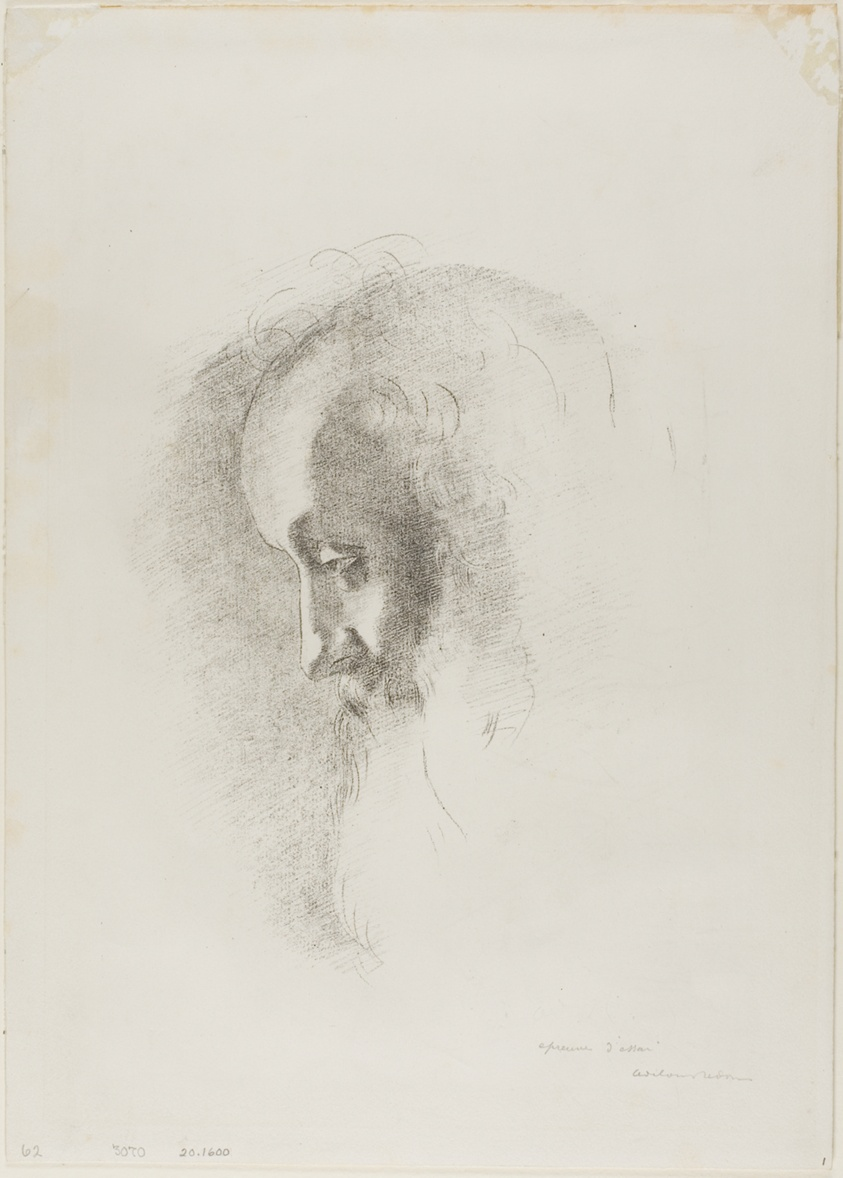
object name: Print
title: To Old Age, from Night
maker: Odilon Redon (French, 1840-1916)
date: 1886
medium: Lithograph in black on white wove paper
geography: France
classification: lithograph; print; prints and drawing; paper